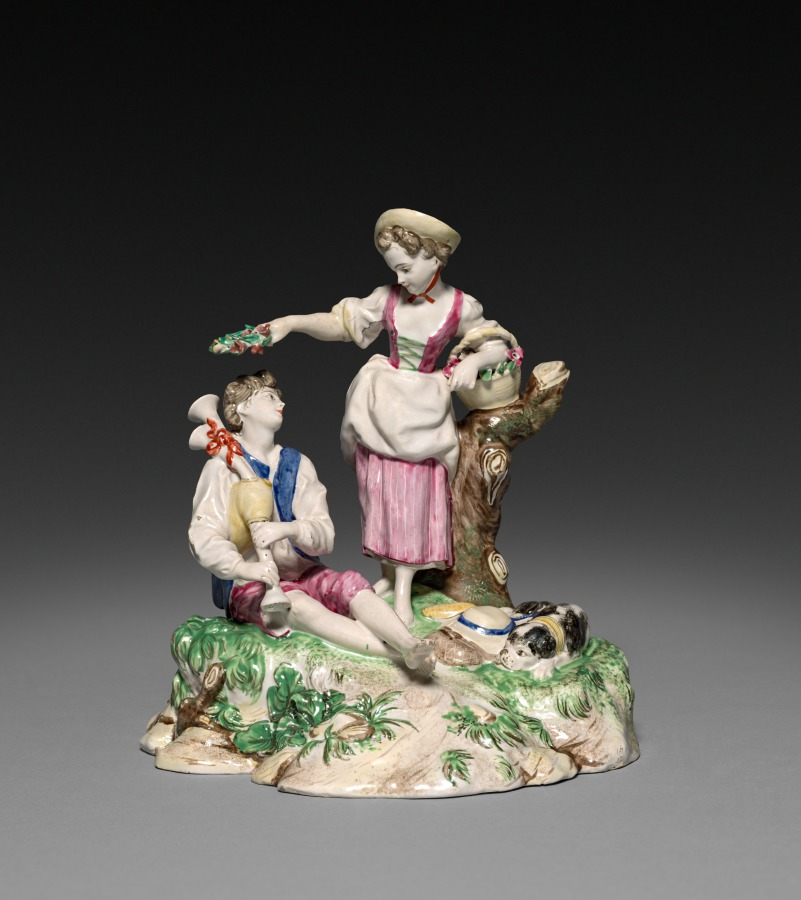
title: Shepherd and Shepherdess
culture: France, 18th century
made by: possibly by Niderviller Factory (French)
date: 1770–1775 ?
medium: faience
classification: Ceramic